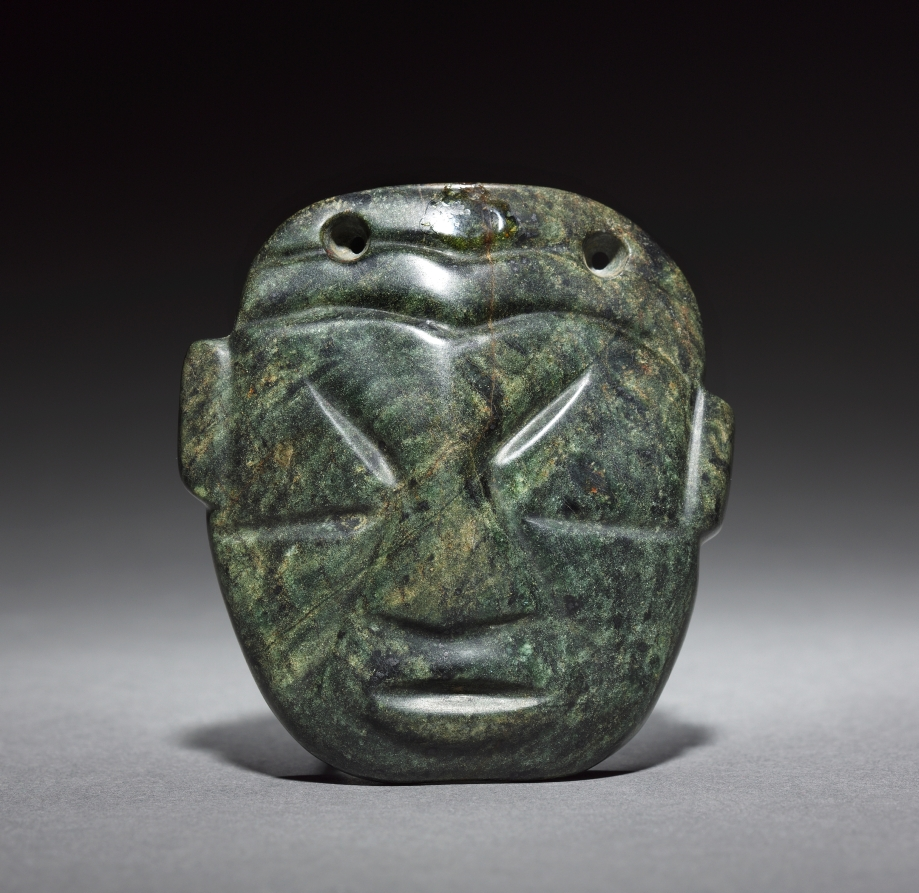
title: Pendant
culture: Mexico, Central Highlands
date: 1–900 CE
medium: jade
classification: Jade